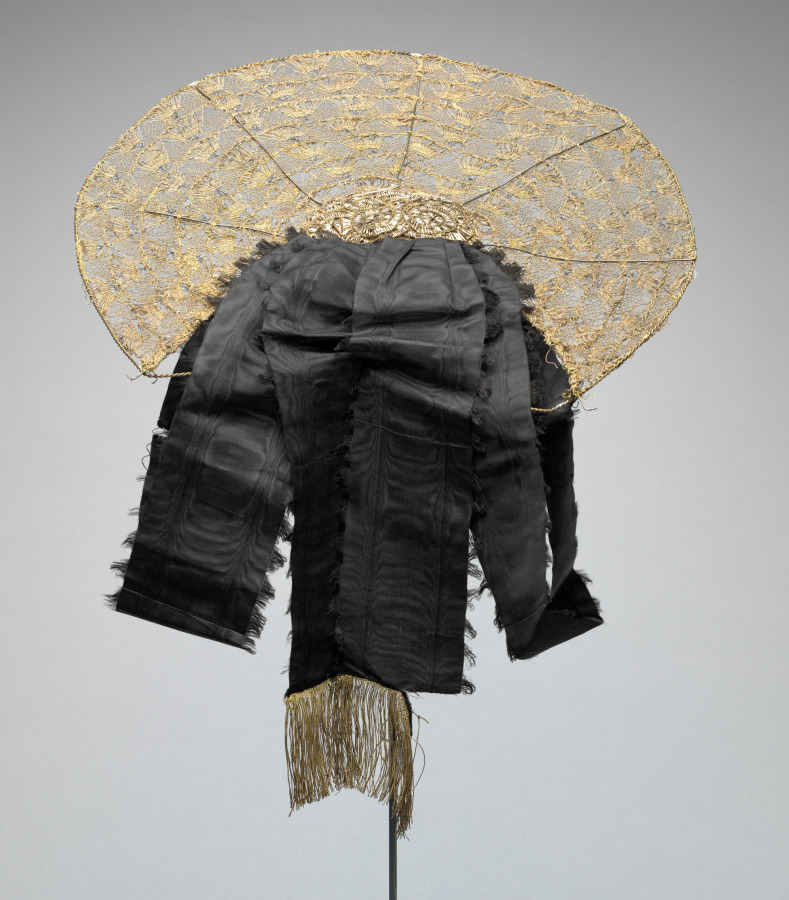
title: Bonnet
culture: Germany, Early 20th Century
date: early 1900s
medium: lace, wire, tinsel, moire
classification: Garment